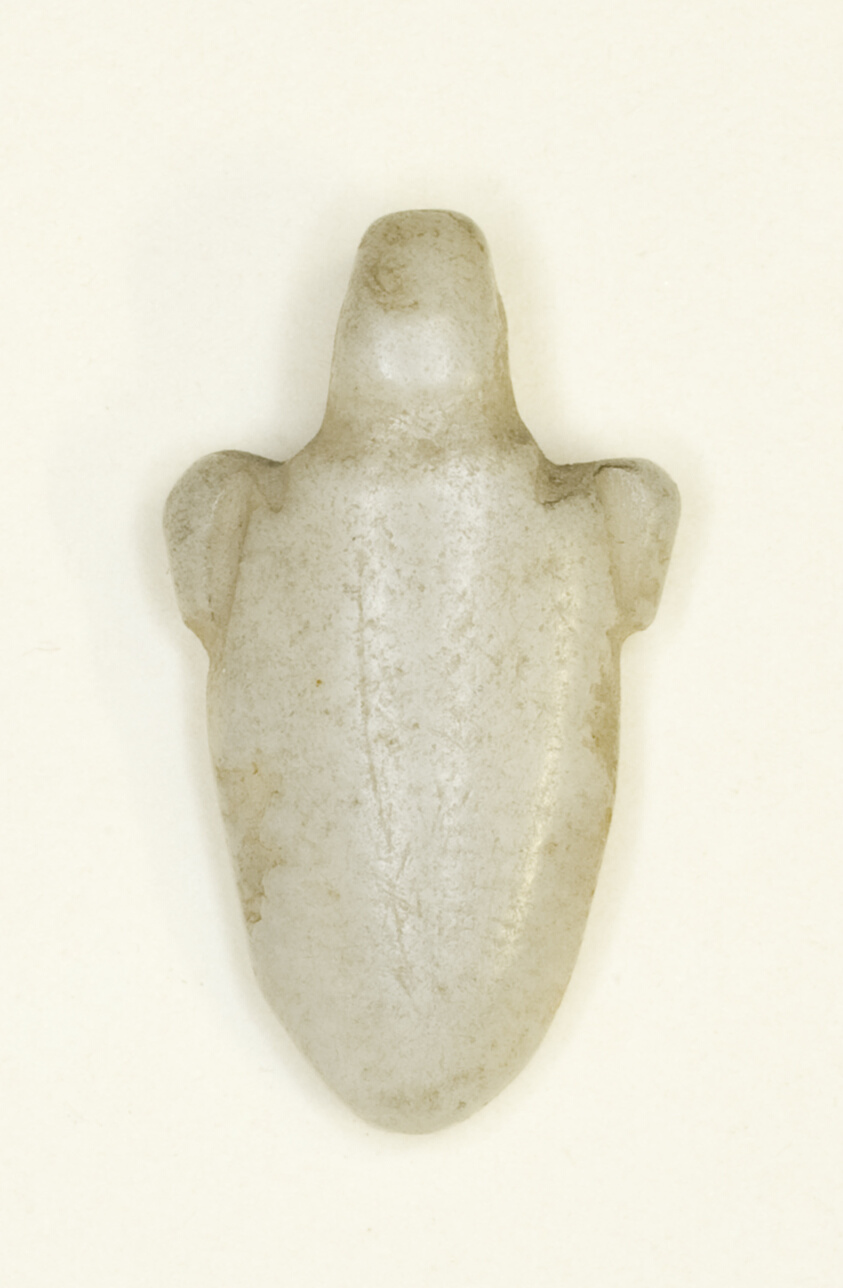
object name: Costume and Accessories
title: Amulet of a Heart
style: third intermediate period, late period (egyptian), egyptian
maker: Egyptian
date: Third Intermediate Period–Late Period, Dynasties 21–26 (about 1069–525 BCE)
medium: Stone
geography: Egypt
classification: amulet; jewelry; ancient art; bead; costume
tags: anatomy, heart shape